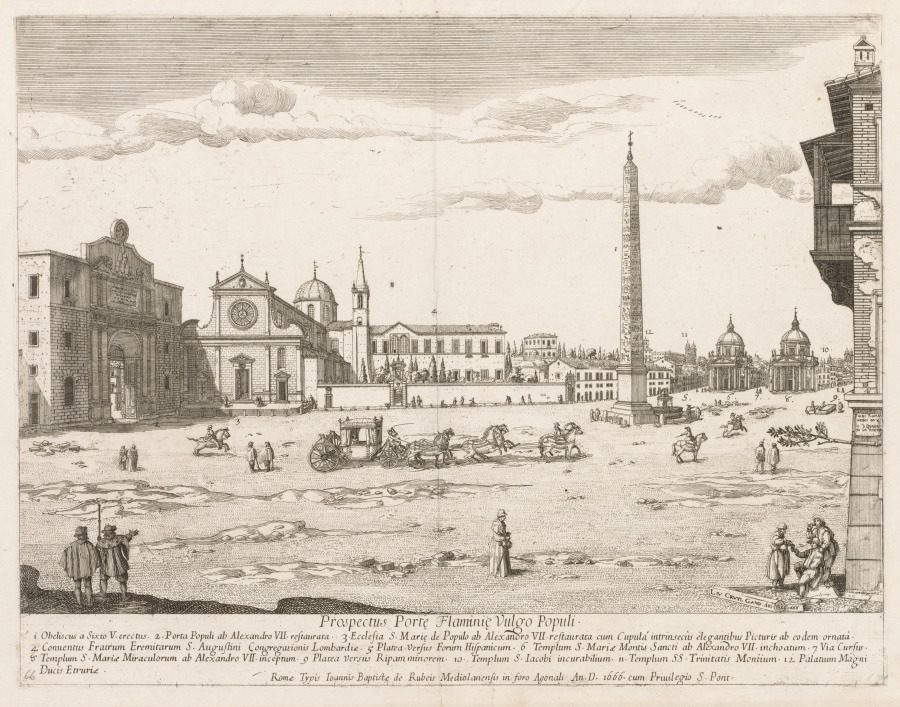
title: Piazza del Popolo from "Prospectus Locurum Urbis Romae Insign[ium]"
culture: Flanders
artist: Lievin Cruyl (Flemish, c. 1640-c. 1720)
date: 1666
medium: etching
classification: Print